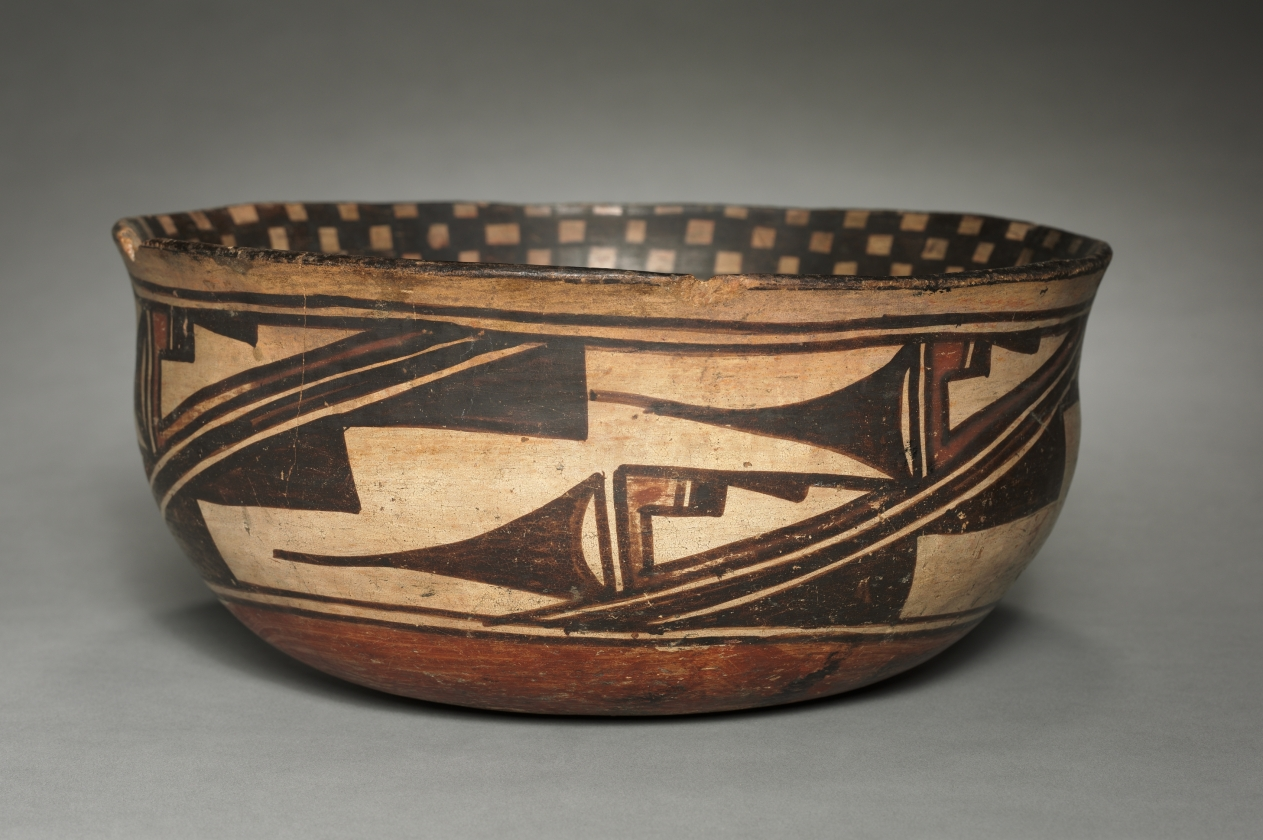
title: Stew Bowl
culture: Southwest,Pueblo, Hopi, Post-Contact Period, 20th century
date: 1870– 1880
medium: ceramic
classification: Ceramic